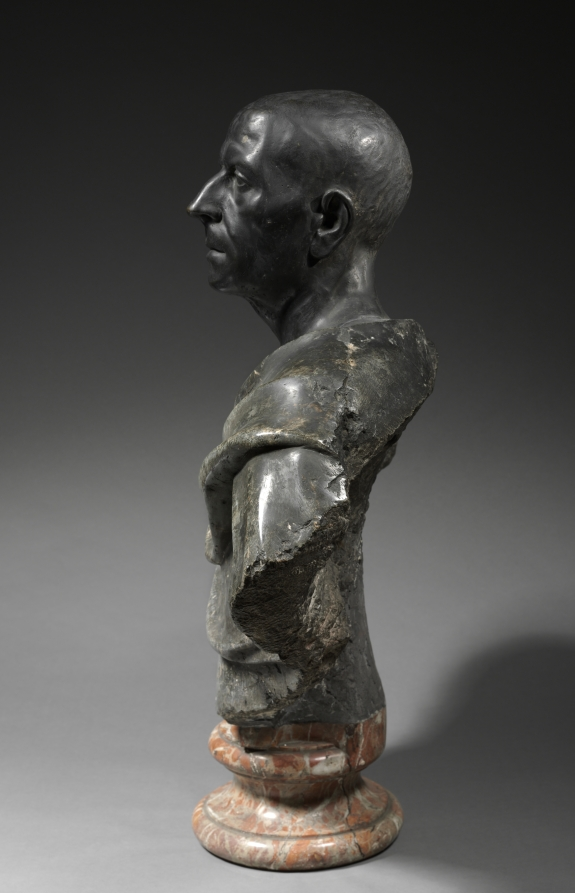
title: Bust of the Ludovisi Cicero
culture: Italy, 17th century or later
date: 1600s or later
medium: marble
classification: Sculpture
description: This work is a variant on the so-called Ludovisi Cicero, a bust in the Uffizi, Florence, that was long-believed to represent the famous Roman orator, but in fact appears to represent an unknown intellectual from the late Roman Republic or early Empire. This interpretation may date as late as the 20th century, and may have been assembled from separate parts.